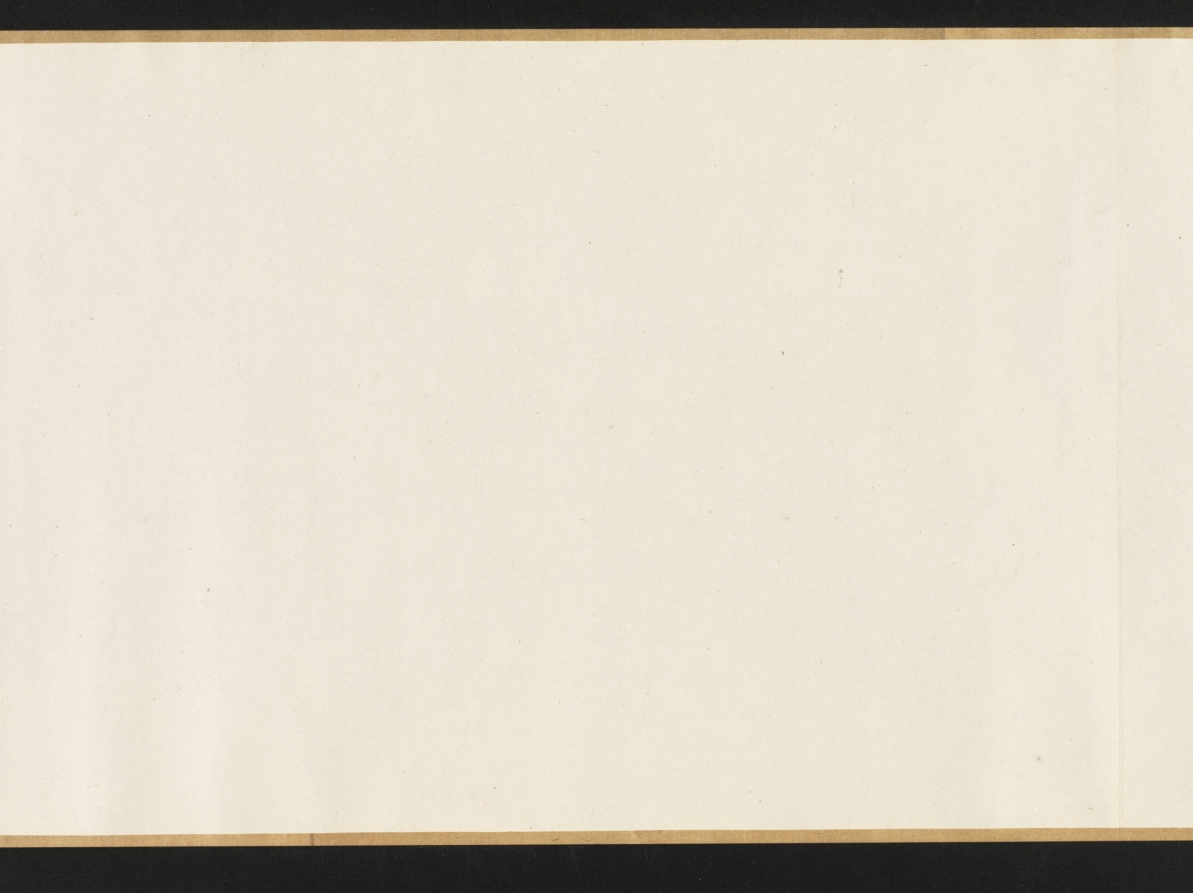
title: The Lantern Night Excursion of Zhong Kui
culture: China, Yuan dynasty (1271-1368)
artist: Yan Hui (Chinese, active 1270–1310)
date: late 1200s–early 1300s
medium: handscroll; ink and slight color on silk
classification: Painting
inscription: Artist's signature [and probable seal]: Yan Qiuyue 顏秋月 Title on frontispiece and 1 seal of Niu Shuyu 鈕樹玉 (1760–1827): Qiuyue mohuan 秋月墨幻 [Qiuyue's Ink Fantasy]. 31 additional seals: 2 of Yang Shiqi 楊士奇 (1365–1444); 2 of An Guo 安國 (1481–1534); 8 of Xiang Yuanbian 項元汴 (1525–1590); 2 of Geng Zhaozhong 耿昭忠 (1640–1686); 4 of Pu Tung 溥侗 (1870–1952); 7 of Tan Jing 譚敬 (1911–1991); 1 of Liu Ting-chih (20th c.); 5 unidentified.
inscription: An inscription by Zizhi Shanren 紫芝山人 [probably Jiang Hui 蔣惠], dated 1389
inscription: An inscription by Wu Kuan 吳寬 (1436–1504)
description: Here, the demon queller Zhong Kui leads a nightly procession of street entertainers with bare, muscular bodies and demonic faces. Some wear shabby clothes, and all perform stunts and tricks to astound and scare the viewer. In fact, a New Year custom in cities of southeast China had the poor, disguised as demons, process through the streets and play their tricks to clear households of evil spirits and welcome the spring. From right to left, a demonic figure leads the procession and beats a drum; another lifts a large rock; one stands on his hands trying to drink; one balances a jar on his elbow; three hold and wield weapons; one carries a folded chair covered by a cow’s skin; another holds Zhong Kui’s qin (zither), books, brush, and inkstone. At the end of the scroll, two figures offer a cup and bottle of wine to Zhong Kui, who lifts his hand in command.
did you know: Zhong Kui was an ancient ghostbuster.